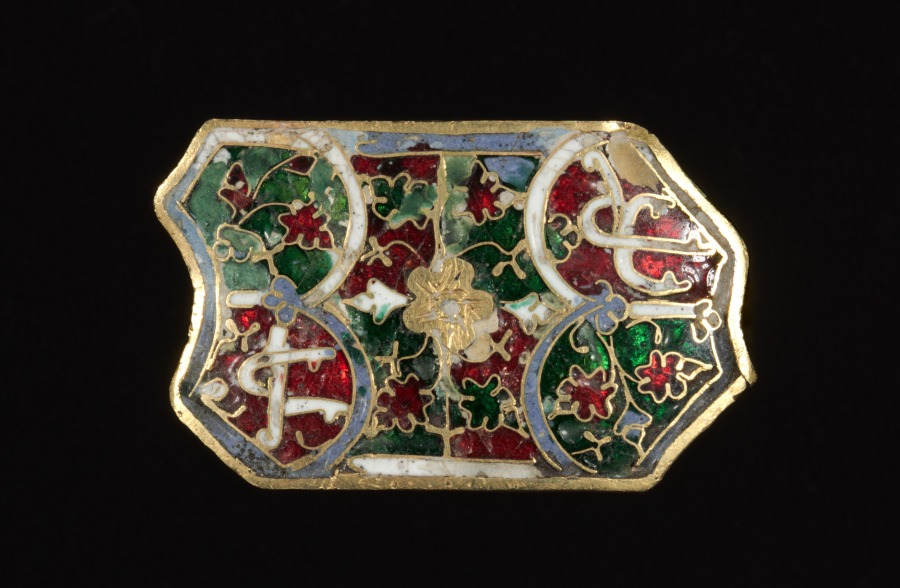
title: Pair of Plaques (Appliqué)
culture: Spain (Hispano-Moresque), 14th century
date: 1300s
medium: translucent enamel on gold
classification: Enamel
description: This oblong plaque is decorated with pseudo-Kufic (fake Arabic) designs indicating that it was produced in Spain under Muslim influence. It may have served as an applied ornament to some article of personal adornment such as a belt. It is possible that the design was inspired by Arabic coinage.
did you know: Enamel can be made opaque or translucent; when translucent, it resembles stained glass, allowing light to pass through.